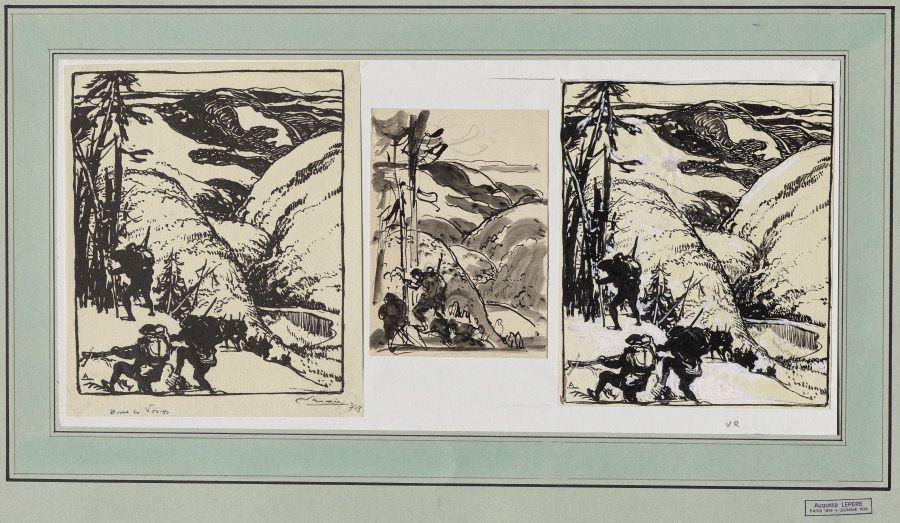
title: Dans les Vosges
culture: France, 20th century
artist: Auguste Louis Lepère (French, 1849–1918)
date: 1914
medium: brush and black ink over pencil with white highlights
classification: Drawing